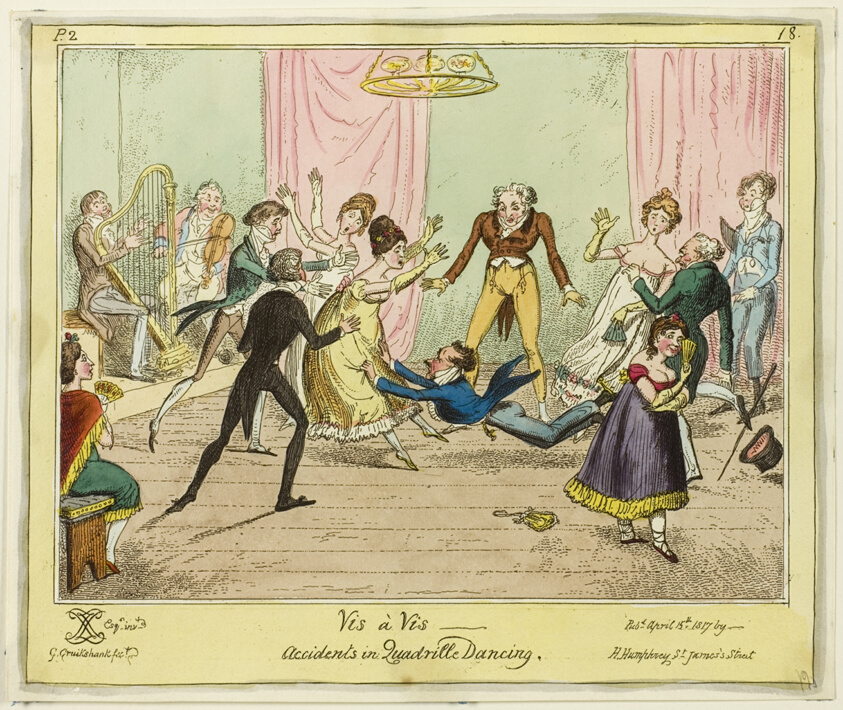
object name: Print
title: Vis a Vis - Accidents in Quadrille Dancing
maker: George Cruikshank (English, 1792-1878); published by Hannah Humphrey (English, c. 1745-1818)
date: published April 15, 1817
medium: Hand-colored etching on paper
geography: England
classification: etching; print; prints and drawing